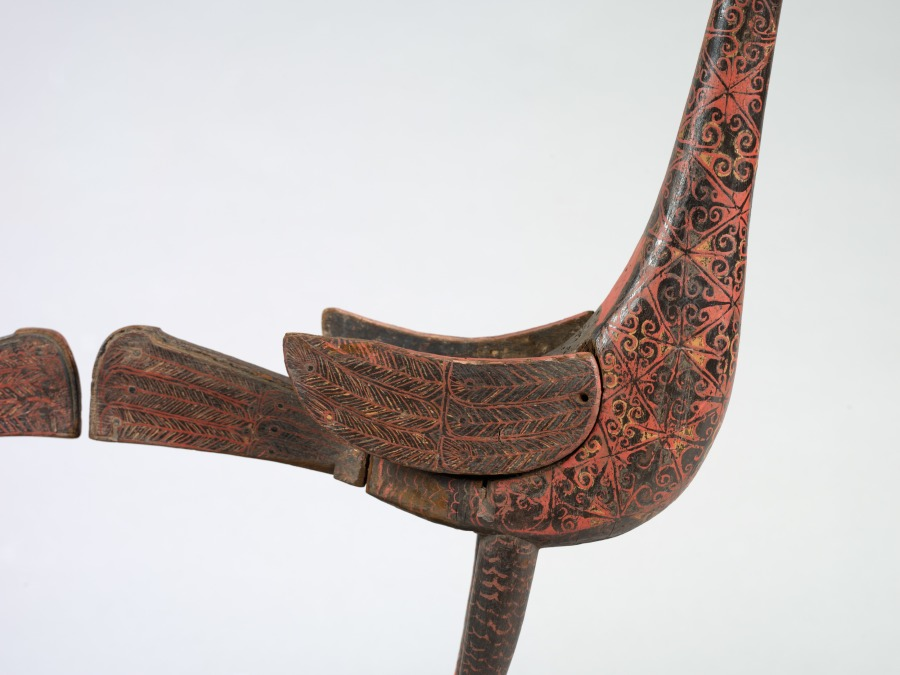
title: Cranes and Serpents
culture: China, reportedly from Hunan province, Changsha, Warring States period (475–221 BCE), State of Chu (c. 1046–223 BCE)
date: 475–221 BCE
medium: lacquered wood with polychromy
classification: Sculpture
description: A different style of ritual art developed in the state of Chu in South China. In addition to bronze vessels, lacquered wood artifacts expanded the repertory of ritual implements. This extraordinary sculpture was probably a drum stand for supporting a suspended drum in ritual ceremonies. It is unique among other excavated drum stands of the Chu, which typically show two birds standing on tigers. The theme of the bird stepping on the serpent was common in the Chu visual culture. Yet the slender proportions and seemingly flimsy structure of this particular set raise the question of whether it was utilitarian or mostly served symbolic functions in the tomb. The birds' and serpents' bodies have designs painted in red lacquer and yellow pigment against the black lacquer. Scientific analyses confirm the additional use of a blue or green pigment that has been discolored over time.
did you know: The cranes' long necks allowed a lightweight drum to be suspended from strings through the beaks, while the densely intertwined snakes provided a weighty base to stabilize the object during musical performances.